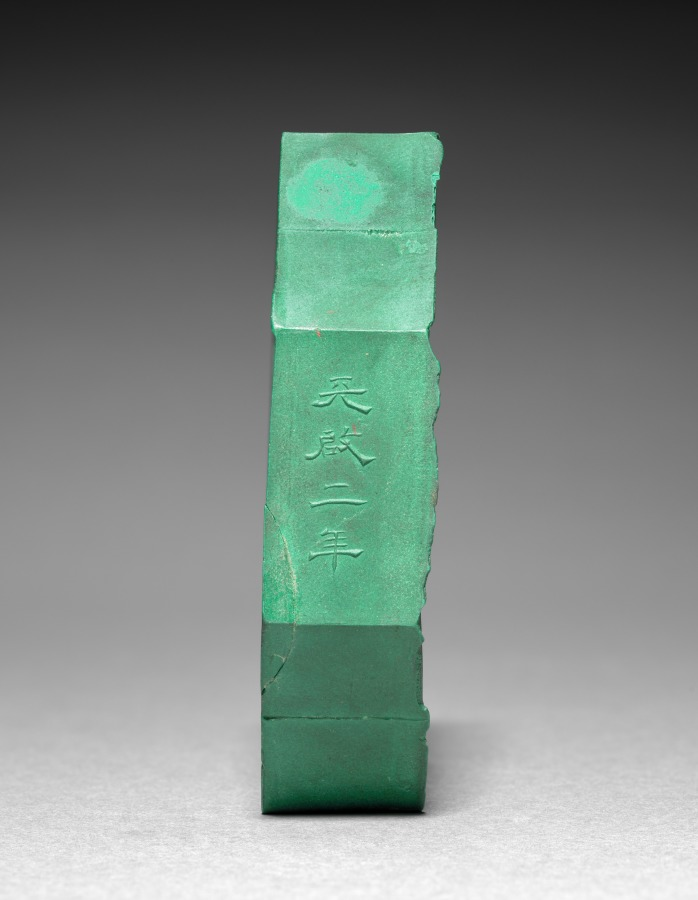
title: Octagonal Ink Cake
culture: China, Ming dynasty (1368–1644)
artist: attributed to Cheng Junfang (Chinese, active c. 1570-c. 1624)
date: 1622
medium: green ink cake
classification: Miscellaneous